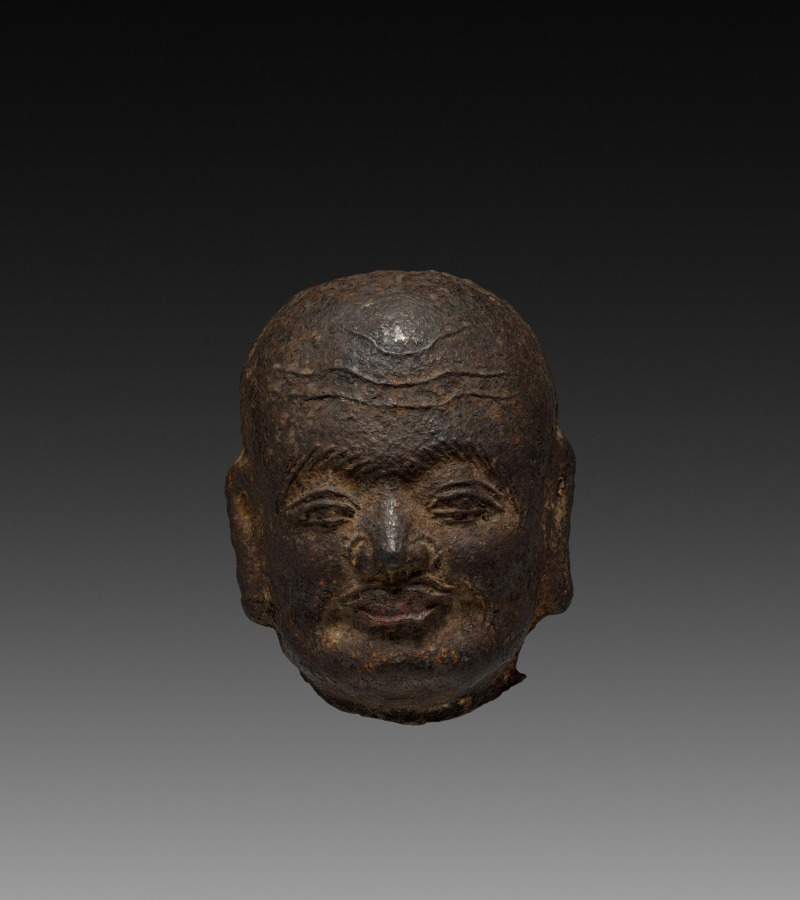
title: Head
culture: China, Song dynasty (960-1279)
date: 960–1279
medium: iron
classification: Sculpture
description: The shaven head and face of this ascetic expresses character and personality. It may have once been part of a figure of a monk or lohan, an enlightened being with supernatural power.